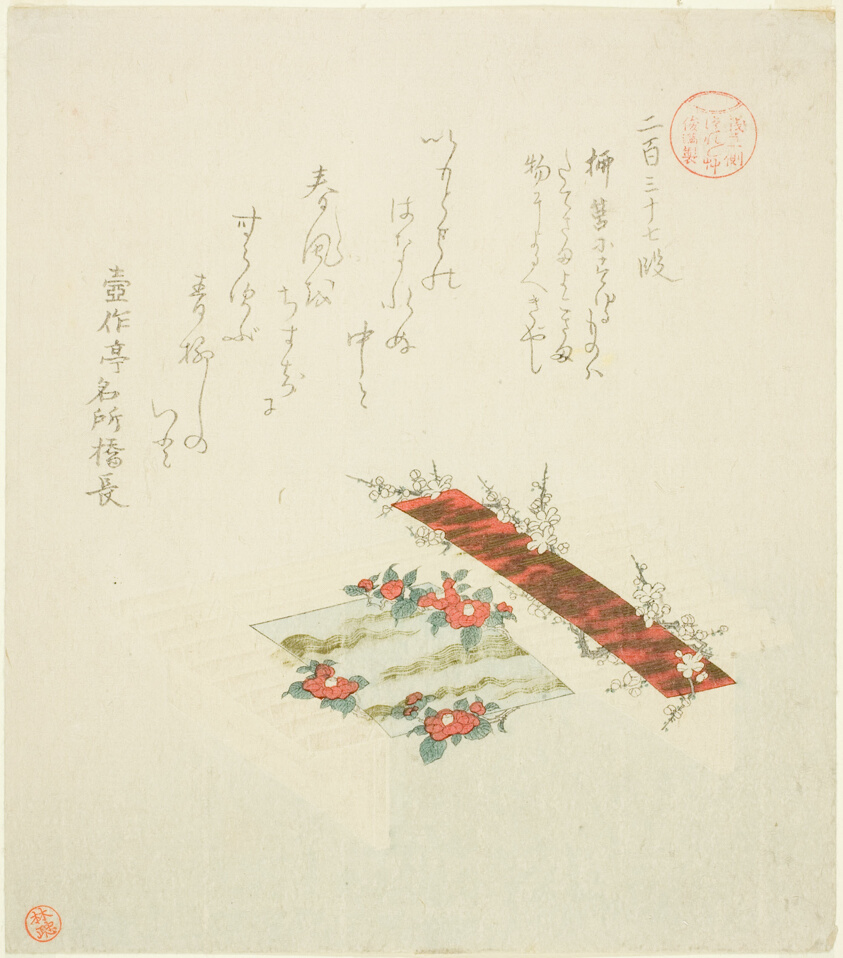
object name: Print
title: Passage 237 (Nihyaku sanjunana dan), from the series "Essays in Idleness for the Asakusa Group (Asakusagawa Tsurezuregusa)"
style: Japanese (culture or style)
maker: Kubo Shunman (Japanese, 1757–1820)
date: early 19th century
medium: Color woodblock print; shikishiban, surimono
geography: Japan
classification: woodblock print; print; asian art